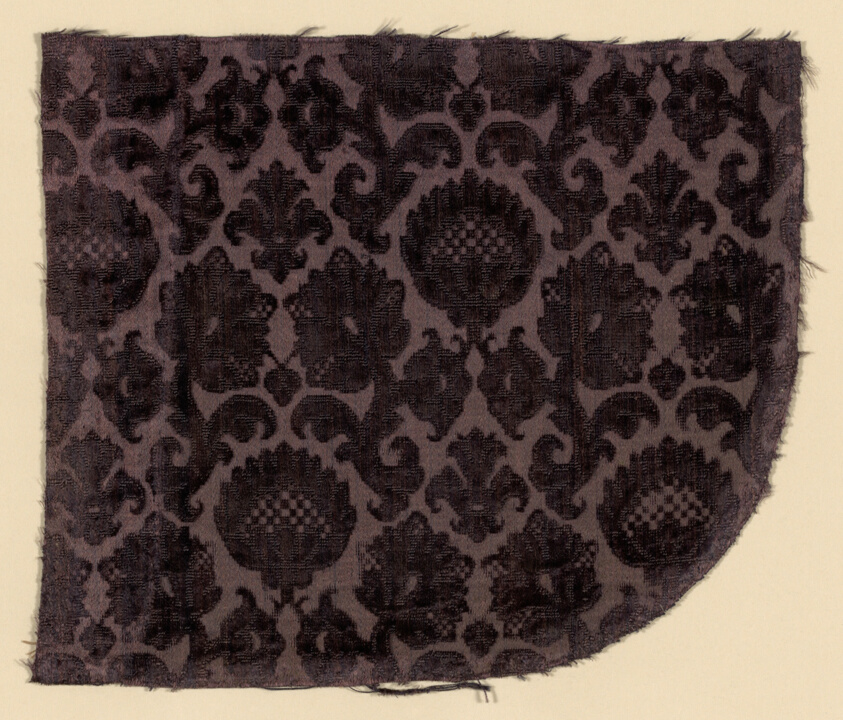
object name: Textile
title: Fragment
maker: Italy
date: 1600/50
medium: Silk, warp-float faced satin weave with supplementary pile warps forming cut, uncut and voided velvet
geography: Italy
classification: textile; weaving - velvet; weaving